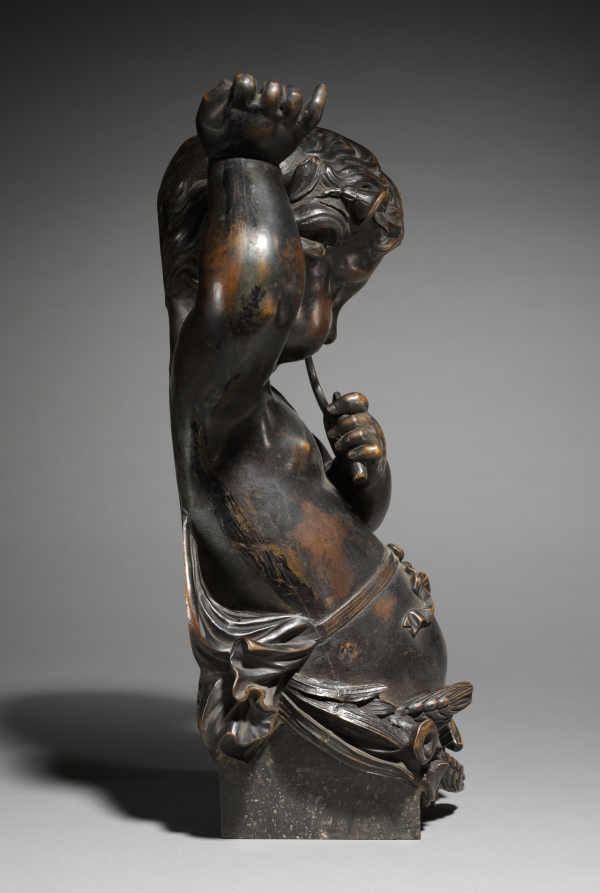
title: Autumn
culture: France, 19th century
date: 1800s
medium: bronze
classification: Sculpture